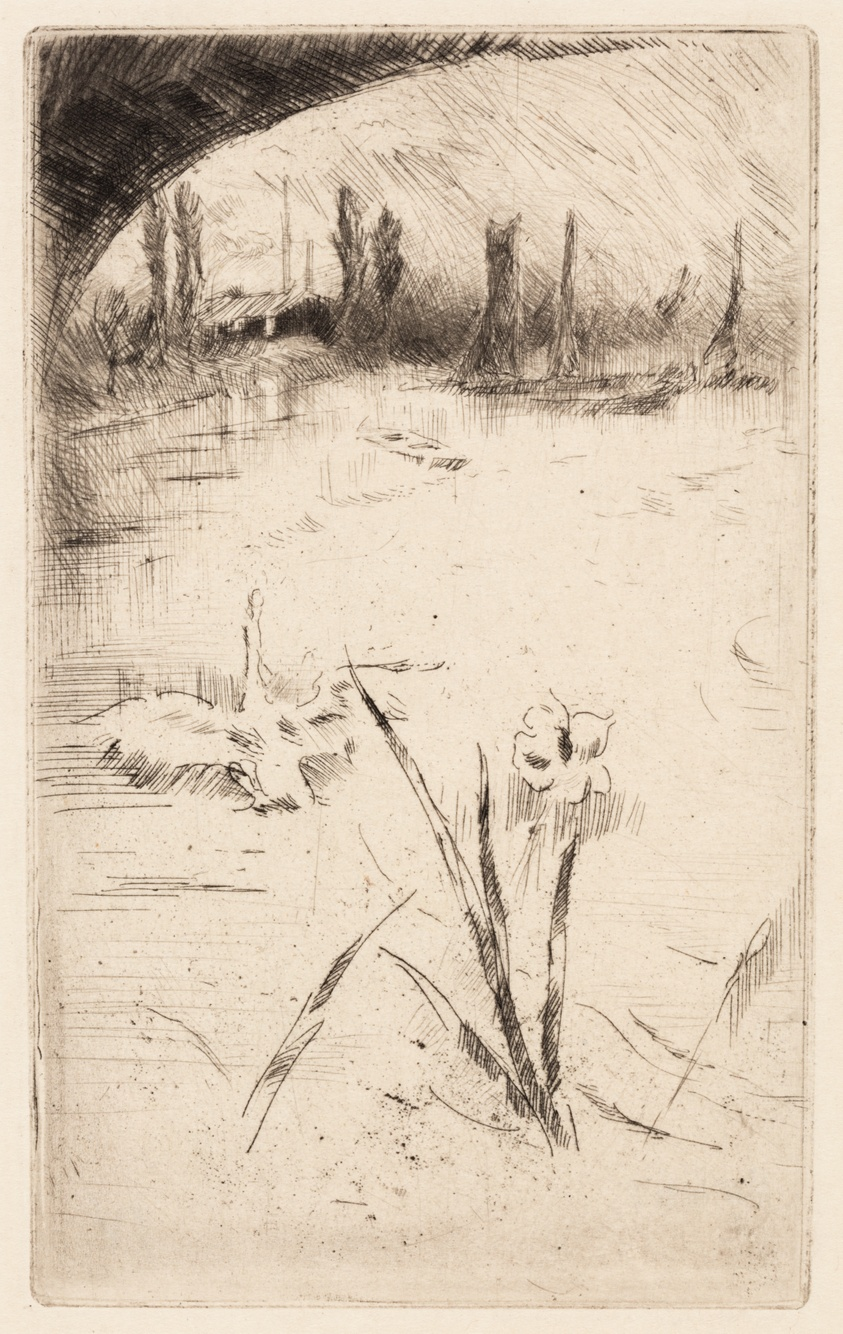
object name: Print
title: Sketch after Cecil Lawson's "Swan and Iris"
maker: James McNeill Whistler (American, 1834-1903)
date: 1882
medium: Etching and drypoint with foul biting in black ink on cream Japanese paper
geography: United States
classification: etching; foul biting; print; prints and drawing; drypoint; paper